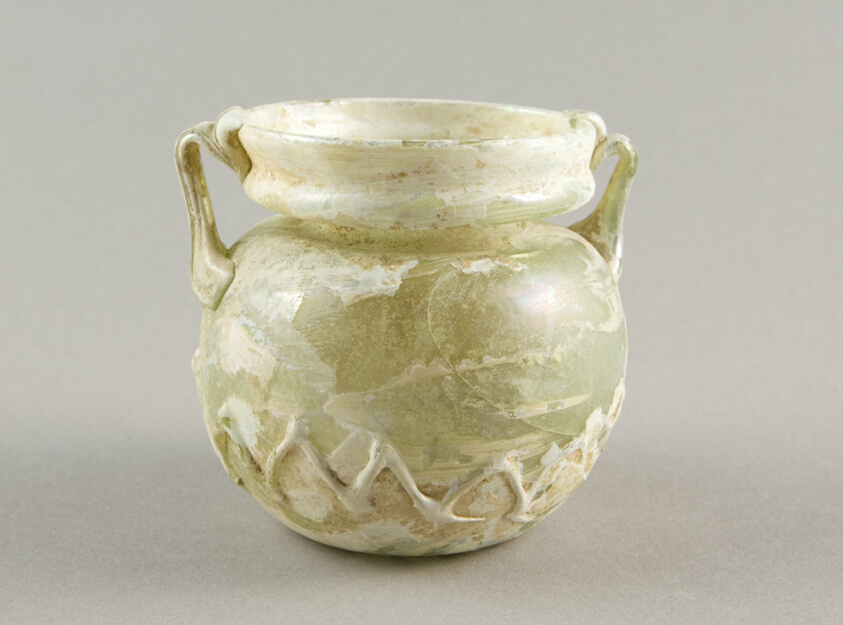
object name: Vessel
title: Jar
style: syrian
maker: Roman; Levant or Syria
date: 4th-5th century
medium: Glass, blown technique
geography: Syria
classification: vessel; glass; ancient art